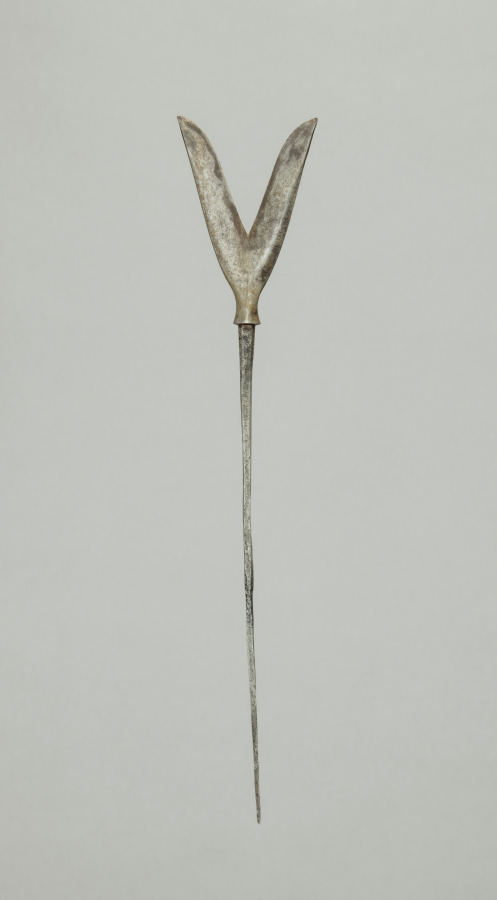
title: Arrow Point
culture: Japan, Edo period (1615–1868)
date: 1700s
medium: steel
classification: Arms and Armor